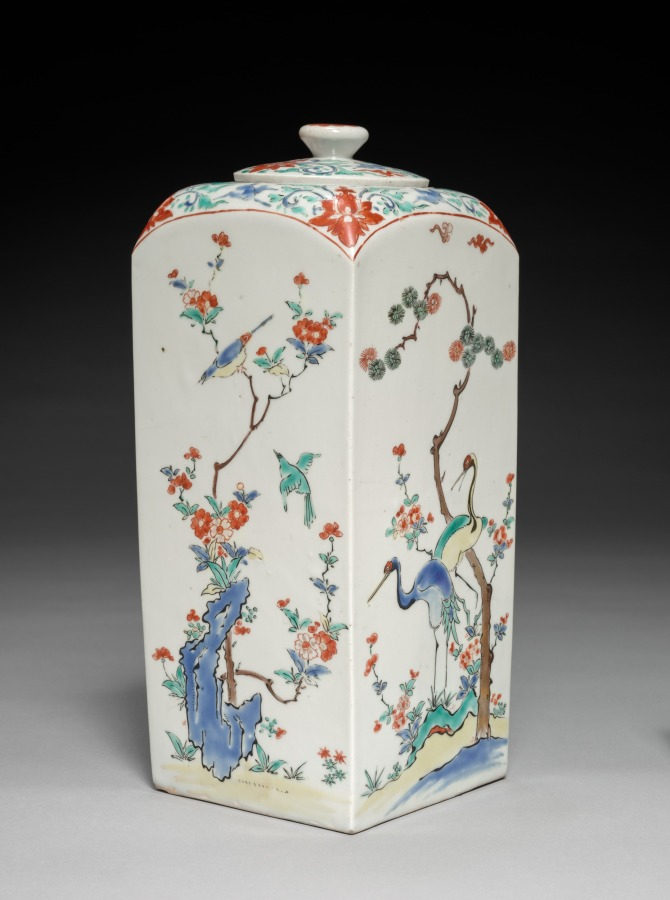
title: Square Jar with Birds and Flowers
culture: Japan, Edo period (1615–1868)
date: late 1600s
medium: Porcelain with overglaze color enamels and gold (Hizen ware, Kakiemon type)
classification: Ceramic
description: This lidded square jar was likely paired with a complementary yet nonidentical mate. The pine tree, plum, and bamboo together form the frequently depicted motif known as the Three Friends of Winter (shōchikubai), so named because of their hardy perseverance in the cold. Each side also features a pair of birds, including cranes on one face and pheasants on another.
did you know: A jar like this was fired at a high temperature, painted with colored enamels, and then fired again at a lower temperature.